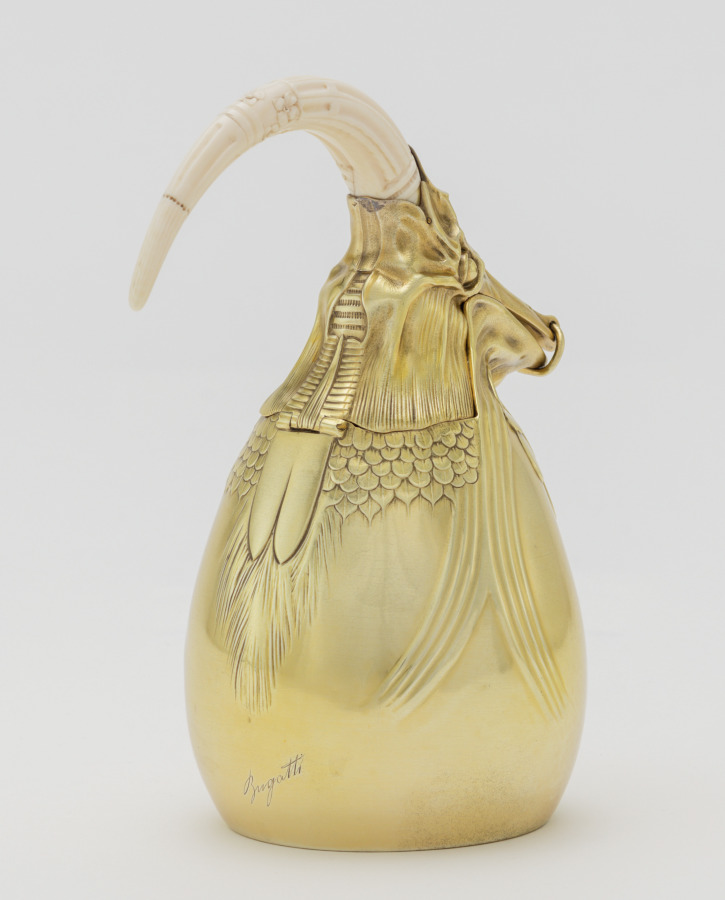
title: Coffee Pot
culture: France, Paris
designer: Carlo Bugatti (Italian, 1856–1940)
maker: Adrien-Aurélien Hebrard (French, 1866–1937)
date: c. 1907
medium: Gilt silver and ivory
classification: Silver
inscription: Made by A. A. Hebrard Firm, Paris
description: This tea and coffee service, salver, and table, together with some now missing cups, were all designed by Carlo Bugatti as an ensemble and presented at the 1902 exposition devoted to decorative arts in Turin, Italy. The set was probably acquired from Bugatti's 1907 exhibition at the Galerie Hébrard in Paris by a wealthy South African widow, Anna Blake, who was living there at the time. Some of the animal and insect motifs suggest mythical beasts or the fossils of prehistoric animals. When Mrs. Blake returned to Cape Town, she took these and other pieces designed by Bugatti with her, and they remained in South Africa throughout her lifetime.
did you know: This coffee pot is part of a larger tea and coffee service designed by Carlo Bugatti.